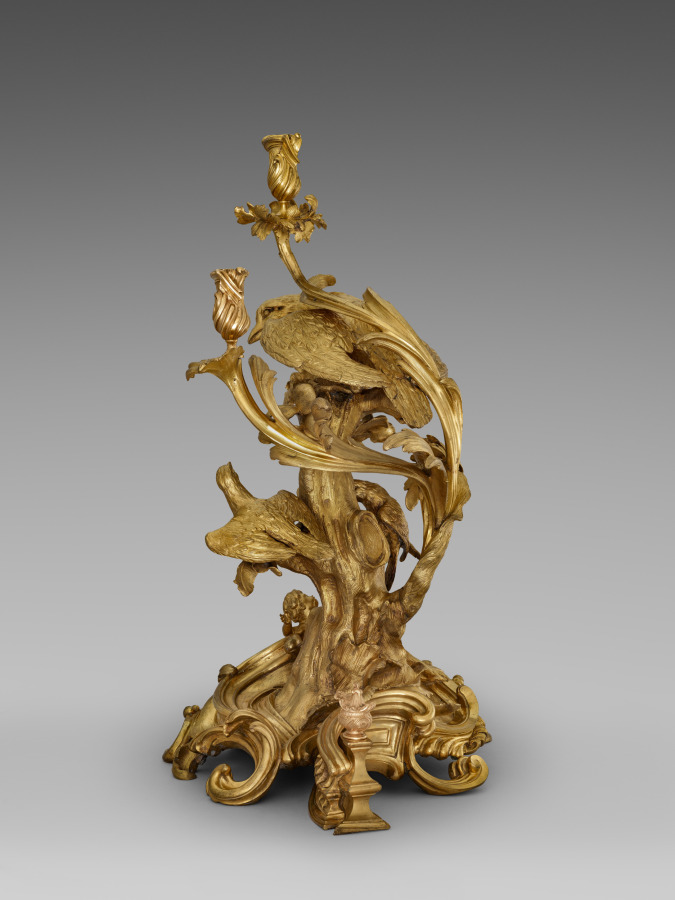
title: Candelabrum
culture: France, 18th century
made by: probably by Jean Joseph de Saint-Germain (French, 1720–1791)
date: c. 1750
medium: gilt bronze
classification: Furniture and woodwork